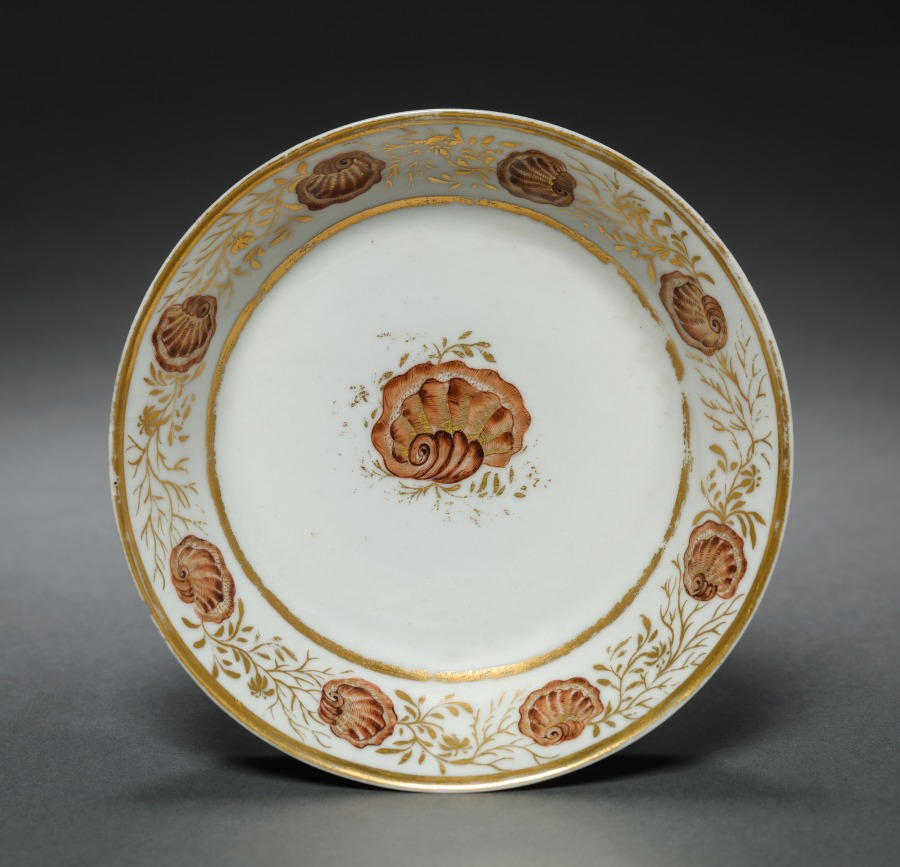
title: Saucer from Oliver Wolcott, Jr. Tea Service (2 of 6)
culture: Chinese Export porcelain, late 18th-early 19th century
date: 1785–1805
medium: porcelain, sepia enamel, gold leaf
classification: Ceramic